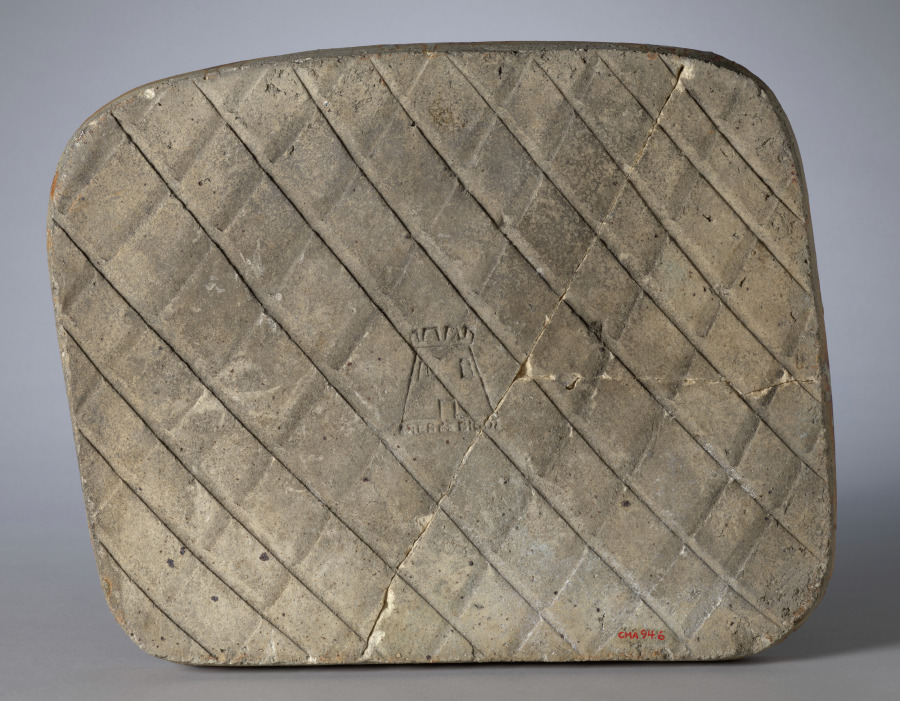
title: Tile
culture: France, early 20th Century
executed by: Alexandre Bigot (French, 1862–1927)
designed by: Henri Sauvage (French, 1873–1932)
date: c. 1900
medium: earthenware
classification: Ceramic